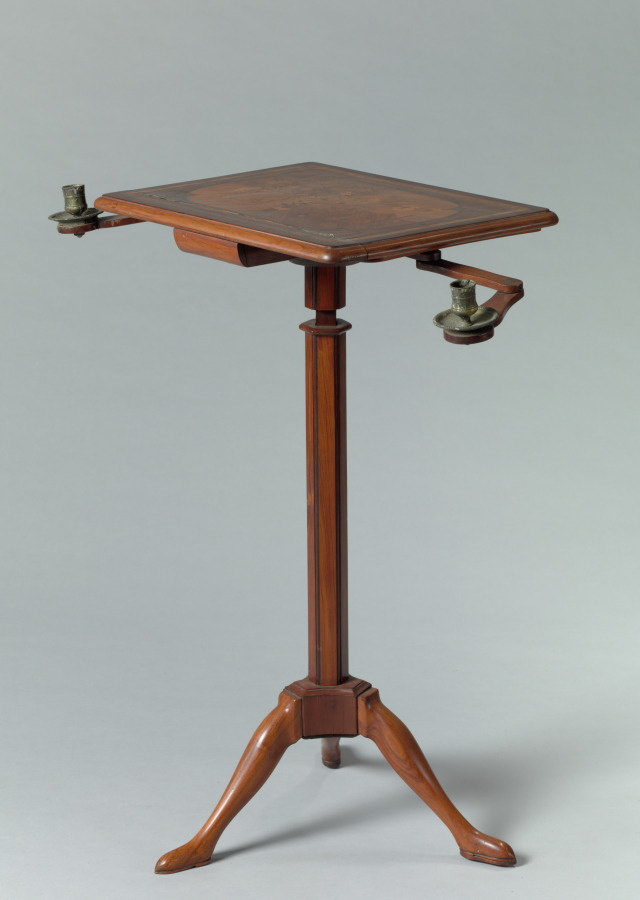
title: Music Stand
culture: France, style of Louis XVI, 18th Century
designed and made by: Canabas (French, 1715–1797)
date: c. 1775–1790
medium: satinwood veneer, with marquetry panel of various woods and metal candle holders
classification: Furniture and woodwork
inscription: signed: Canabas